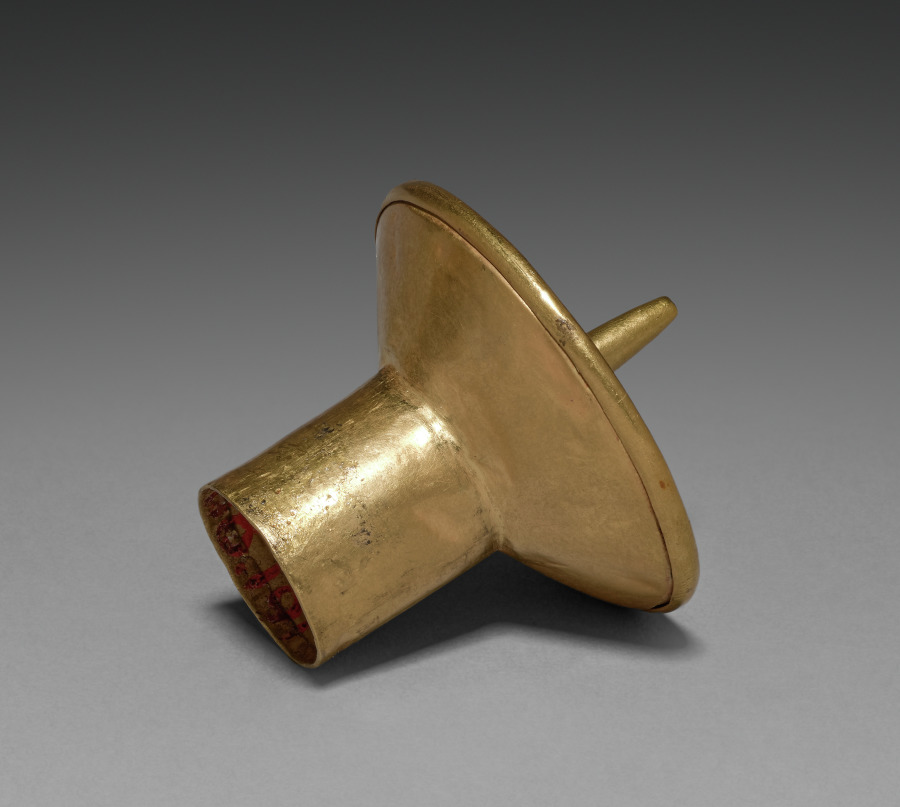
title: Ear Spool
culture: Panama, Conte style, 5th - 10th century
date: c. 400–900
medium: hammered gold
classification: Metalwork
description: Harvard archaeologists excavated this and seven other ornaments from several burials at Sitio Conte, a cemetery famous for its lavish graves of powerful chieftains. The young man buried in Grave 26 was such a chief. His status was stunningly memorialized by 21 human companions and 475 objects, many of them personal ornaments made of gold, including a large chest plaque and a rod-shaped ear ornament.